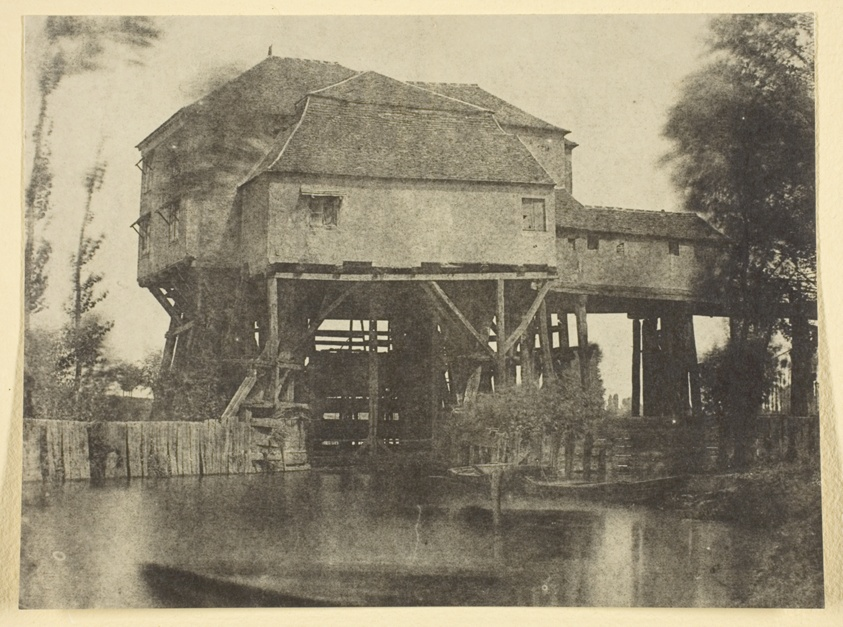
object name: Photograph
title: Le Moulin de Saint-Ouen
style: 19th century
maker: Hippolyte Bayard (French, 1801–1887)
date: 1845, printed 1965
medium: Gelatin silver print, No. 9 from the portfolio "Bayard: XXV Calotypes, 1842-1850" (1965)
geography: France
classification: photographic process; photography; photograph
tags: Collected by Hugh Edwards